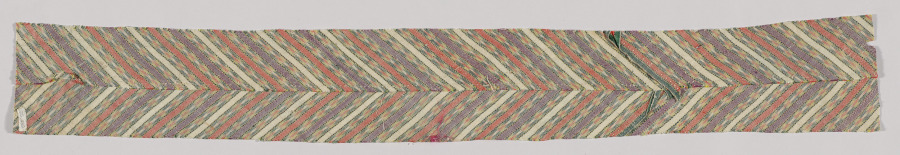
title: Fragment of Striped Satin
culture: India, Surat, 19th century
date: 1800s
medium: satin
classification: Textile